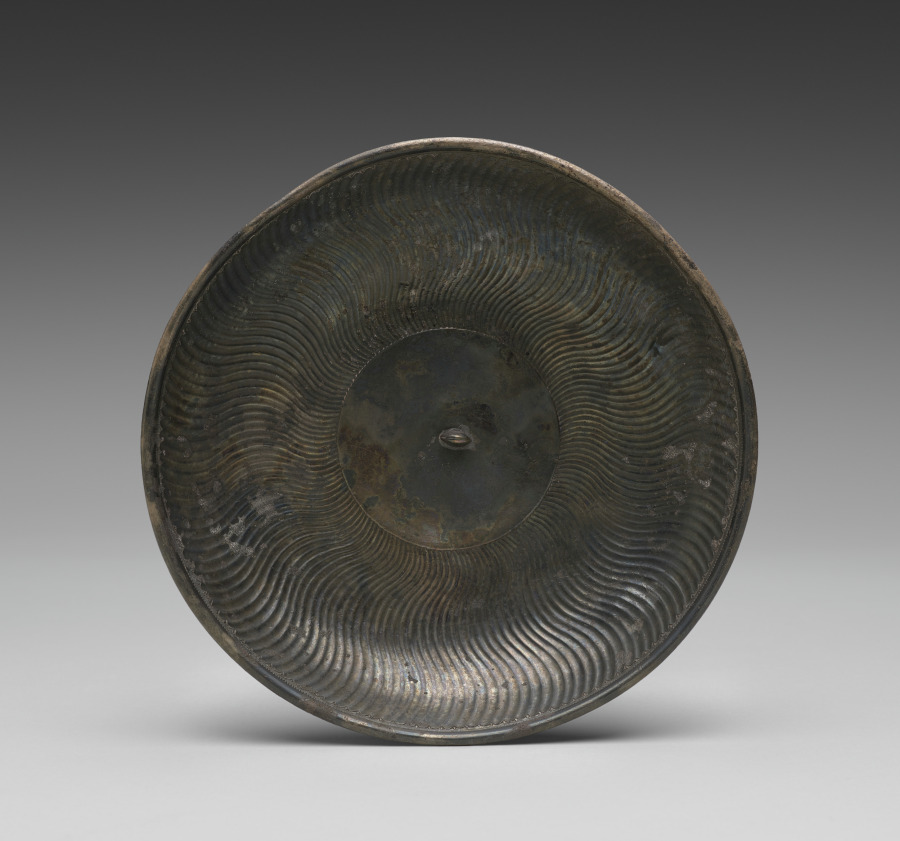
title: Bowl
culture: Roman, Imperial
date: c. 100–300 CE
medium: silver: cast and carved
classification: Metalwork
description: This large cast silver bowl features wavy fluting (sometimes called strigilation) across much of the interior, terminating in a sort of scalloped edge and finely beaded border beneath the rim. Within the central medallion are a miniature oblong shell-like object and the punched inscription VERISS (perhaps a name), both slightly off-center. The combination of wavy fluting, scalloped edges, and a shell-like object may allude to the sea, or to the liquid contents this bowl may once have contained.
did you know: This solid silver bowl weighs nearly one kilogram, more than two pounds.